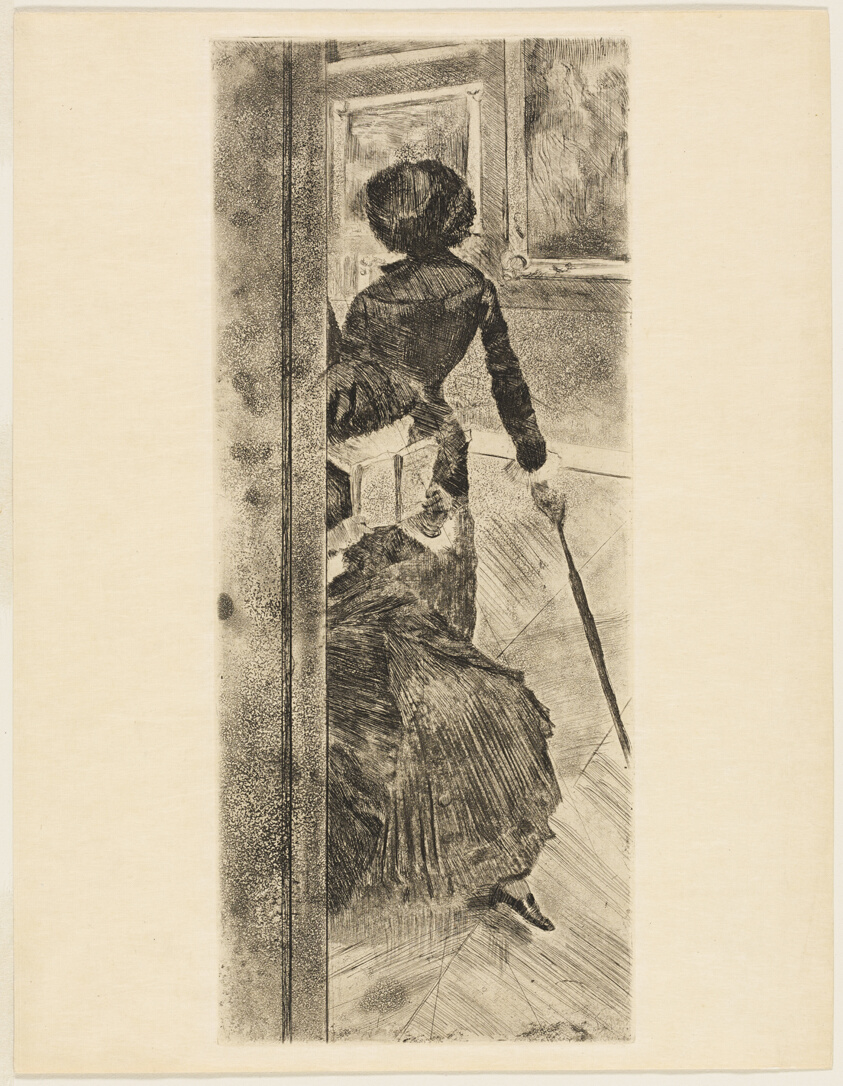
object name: Print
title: Mary Cassatt at the Louvre: The Paintings Gallery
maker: Edgar Degas; French, 1834-1917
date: 1879–80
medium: Etching, soft ground etching, aquatint, and drypoint on cream wove paper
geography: France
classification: etching; print; prints and drawing; paper